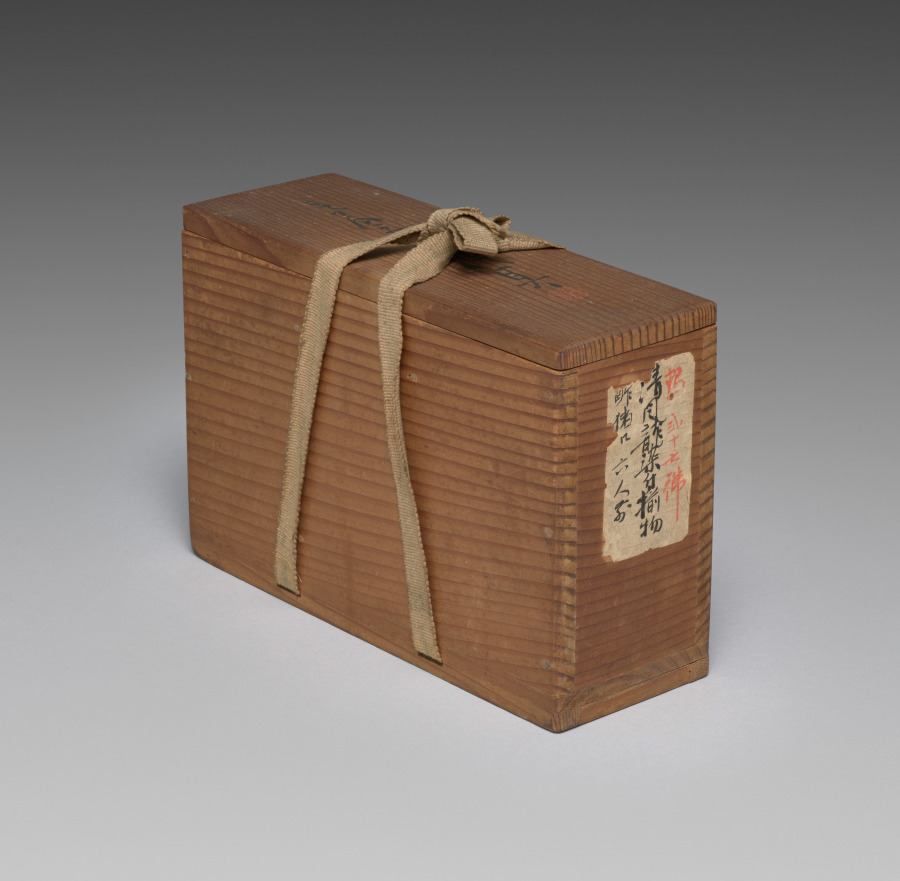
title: Sake Cups with Dragons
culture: Japan, Meiji period (1868–1912)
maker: Seifū Yohei III (Japanese, 1851–1914)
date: 1893–1914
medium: Set of six sake cups; porcelain with underglaze blue and iron oxide rims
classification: Ceramic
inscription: 大日本清風造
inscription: 清風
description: Each of these sake cups pictures two backward-looking dragons. The highly stylized creatures resemble jade carvings.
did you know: Seifū Yohei III was inspired by the Chinese mythical animals that were common on porcelain objects made at Jingdezhen in China during the Ming dynasty (1368–1644) and then exported around the world.